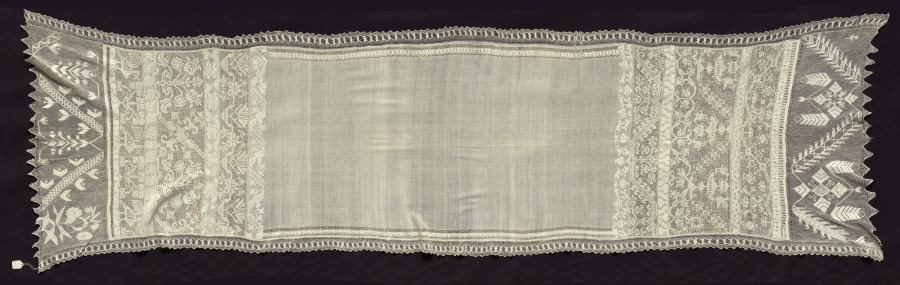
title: Cloth with Border of Vegetal Motifs and Insertion with Bird Motifs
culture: Cyprus ?, 1700s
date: 1700s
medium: Plain weave wool with needle lace, burato insertion (twined ground and darned in two directions), filet/lacis border and edging (knotted ground and darned in one direction), drawn work, and embroidery; bleached linen (est.), wool (est.), and cotton (est.)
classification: Lace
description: Textiles often incorporate multiple needlework techniques within a single piece. One of the techniques in this example of lace is called cutwork. In cutwork, portions of the textile ground, such as a linen or cotton cloth, are cut away and threads are removed to create holes. The edges of the hole are then reinforced with embroidery and a pattern of needle lace can be created within the perimeter. Rather than adding to the cloth to create a design, the craftsperson removes threads to fabricate a pattern.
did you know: This lace was given to the museum by Louise Tifft Brown, a native Clevelander who became an expert in lace while living in Venice for 35 years.